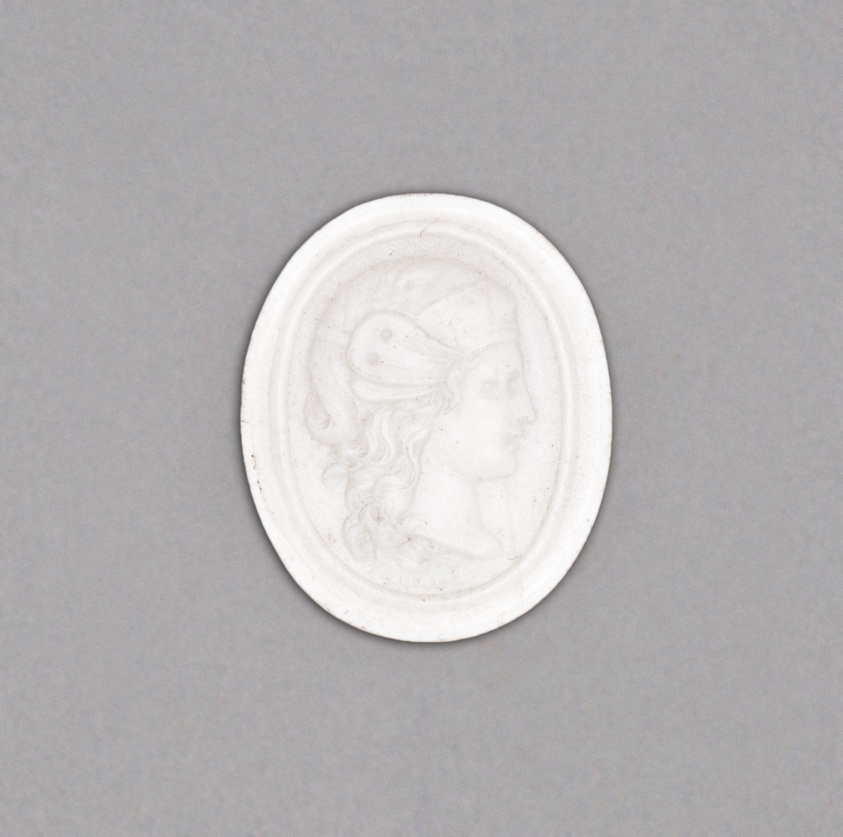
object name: Ceramics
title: Cameo with Hercules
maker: Wedgwood Manufactory (England, founded 1759)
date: Late 18th century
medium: Stoneware (jasperware)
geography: Burslem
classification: cameo (sculpture); sculpture; stoneware; european decorative arts; ceramics